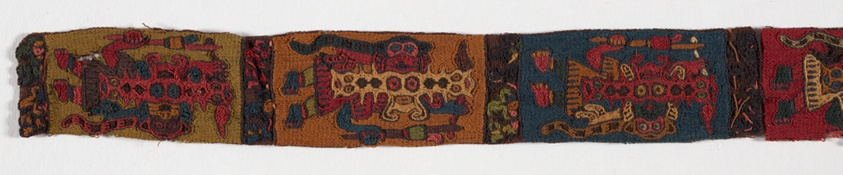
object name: Textile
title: Fragments (Border)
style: nazca, paracas, andean, andes, Pre-Columbian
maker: Nazca; Peru, south coast, Nazca Valley, Coyungo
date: 100 B.C./A.D. 200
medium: Cotton, plain weave; embroidered with camelid wool and cotton in stem and running stitches.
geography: Peru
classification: textile; needlework (visual works)